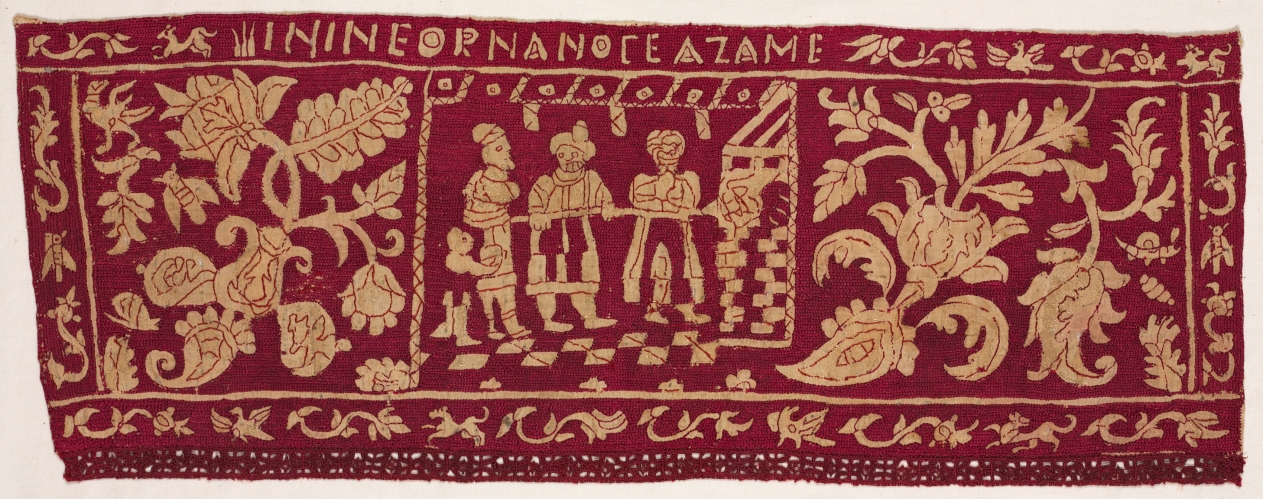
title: Embroidered Border: The Baking of Unleavened Bread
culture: Italy, 16th-17th century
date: 1500s-1600s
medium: Plain weave linen; embroidery in silk; attached border of needle lace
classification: Embroidery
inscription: Embroidered lettering in upper margin: ININEORNANOCEAZAME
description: The border fragments on the left tell the story of the Israelites baking unleavened bread during the first Passover, after which they were delivered out of captivity in Egypt. In the top panel, bakers mix and knead the dough; the bottom panel shows the bakers standing on a tiled floor while placing the bread into a brick oven. This common household scene would have been familiar to Italian audiences during the Renaissance. Two fragments depict events recorded in the book of Exodus. In the top panel, the pharaoh is shown releasing the Israelites after the last plague (1939.355). In the bottom panel, he changes his mind and pursues them across the parted Red Sea, only to be swallowed up after the Israelites safely crossed (1939.352).